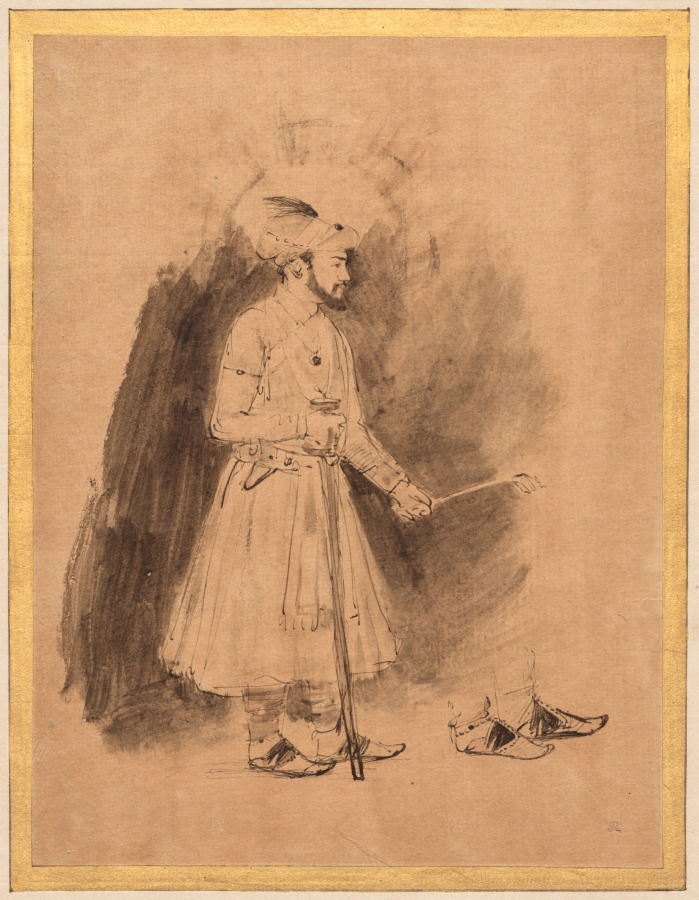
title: Shah Jahan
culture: Netherlands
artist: Rembrandt van Rijn (Dutch, 1606–1669)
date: c. 1656–61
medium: pen and brown ink and brush and brown wash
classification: Drawing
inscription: On verso of secondary support, upper center, in graphite: Portrait of; upper center, in brown ink: Portrait of Sháh Jahán Emperor of Hindustan [inscription in English] / Shah Jahan Padshah [inscription in Persian]; upper right, in graphite: Ouseley / written by Sir Gore Ou[seley] 1809; lower left, in graphite: 334; fragment of old mount (now removed), in blue pencil: 3[crossed out with black ink]; fragment of old mount (now removed), in gray ink: Portrait of Sháh Jehán / Emperor of Hindûstan; in black ink: 5[written over 5 in graphite] Indian Prince [underlined]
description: Rembrandt’s drawing portrays Shah Jahan, the ruler of the Mughal Empire from 1628-58. It is one of twenty-three drawings that Rembrandt made after Indian miniatures, which he had very likely studied in an album then in Holland. By the 18th century, the album had been dismantled, and the model for this drawing now resides at the Schloss Schönbrunn, Vienna. Rembrandt imposed his characteristic realist tendencies on a more detailed, formal, and stylized model, bringing the shah to life with especially fine pen strokes on the face and shoes mixed with evanescent brown ink washes around the figure that introduce a dynamic interplay of light, shade, and figure. Above the shah’s head, he scratched away parts of the ink and paper to create a nimbus shape that frames the profile. His meticulous technique and use of a rare and expensive Japanese paper suggest that he regarded his drawings after Mughal paintings as exceptional.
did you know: The Mughal ruler portrayed in this drawing carries a fly swatter in his left hand.